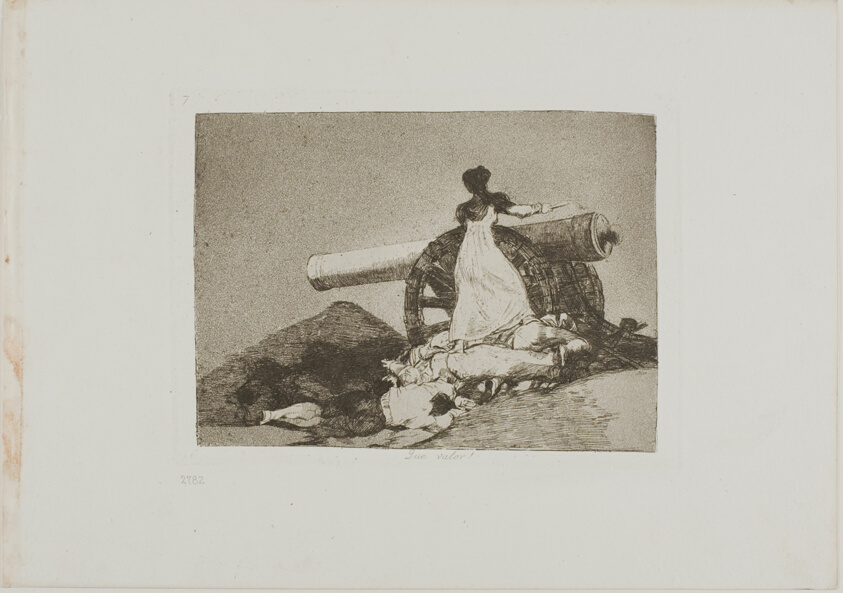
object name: Print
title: What Courage!, plate seven from The Disasters of War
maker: Francisco José de Goya y Lucientes (Spanish, 1746-1828)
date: 1810/12, published 1863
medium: Etching, aquatint, drypoint, burin, and burnishing on ivory wove paper with gilt edges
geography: Spain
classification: etching; print; prints and drawing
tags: war